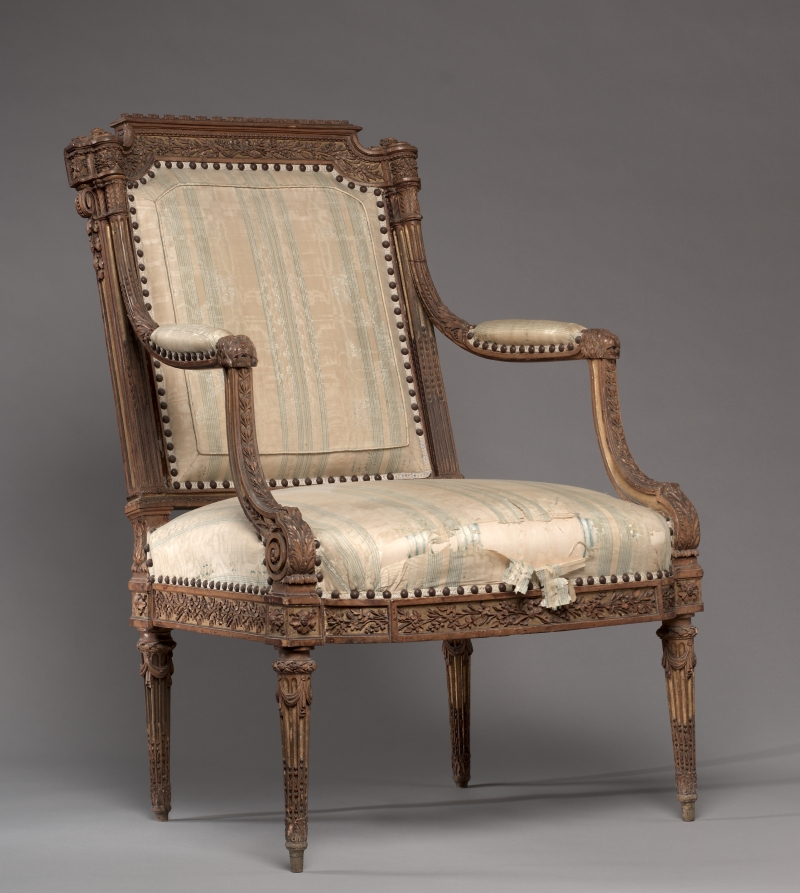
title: Armchair (Fauteuil) (2 of 2)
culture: France, 18th century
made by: Nicolas-Denis Delaisement (French)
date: c. 1785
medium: boxwood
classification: Furniture and woodwork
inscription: signed on front and back of frame of seat underneath: Delaisement with inverted "s."